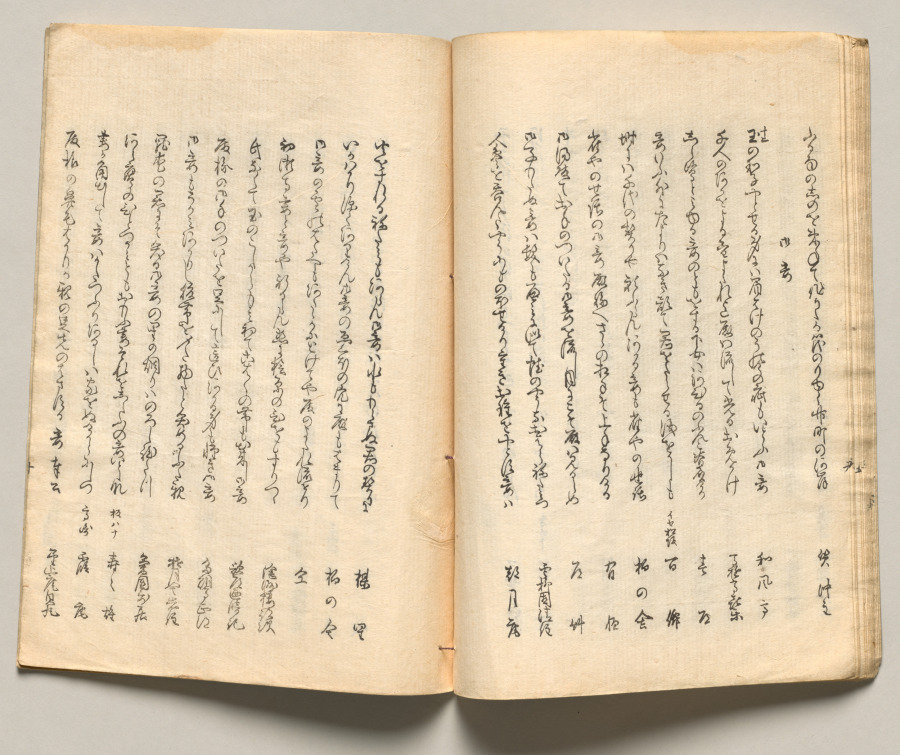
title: Spread Seventeen from Volume Five of People of Japan in Light Verse (Kyōka)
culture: Japan, Edo period (1615–1868)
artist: Utagawa Hiroshige (Japanese, 1797–1858)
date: 1857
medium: Woodblock-printed book; ink and color on paper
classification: Bound Volume